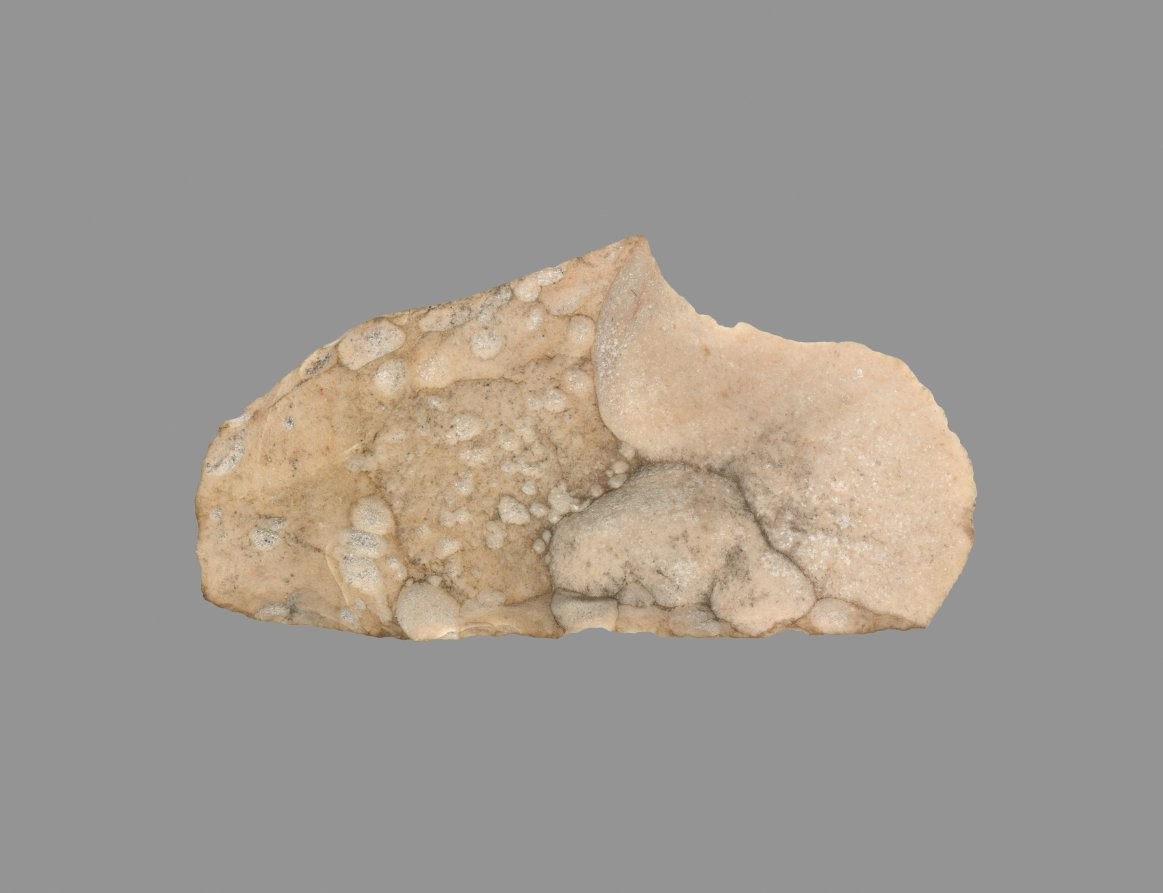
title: Sickle Blade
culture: Egypt, Middle Kingdom (2040–1648 BCE), Dynasty 12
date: 1980–1801 BCE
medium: flint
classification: Implements